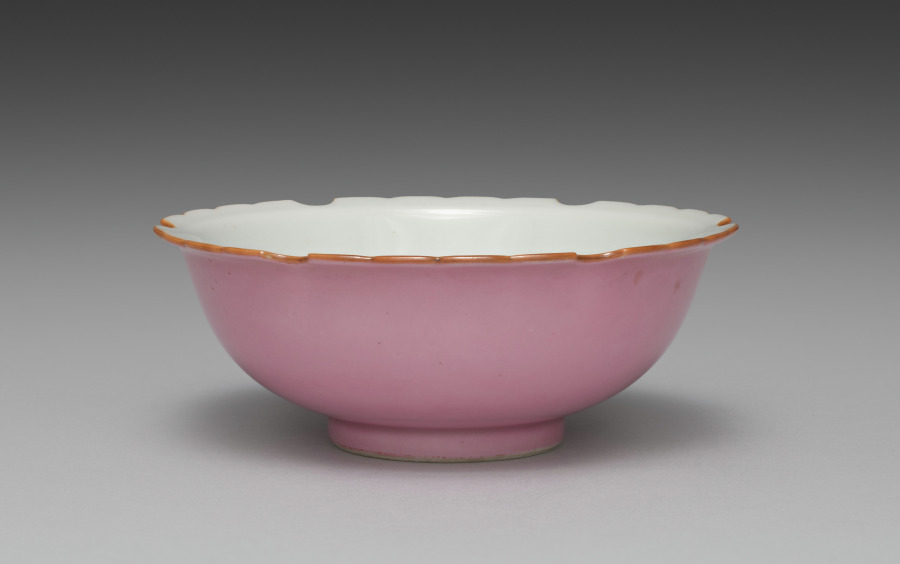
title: Dish from Snow-Flake Side Dishes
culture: Japan, Meiji period (1868–1912)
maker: Seifū Yohei III (Japanese, 1851–1914)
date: 1893–1914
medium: One from a set of six porcelain dishes; porcelain with lobed rims and pink glaze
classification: Ceramic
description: According to the box lid, this set of 6 side dishes, or mukōzuke, are “snow-flower style” (sekkashiki), having mouths shaped like snowflakes. Their mouths, which have 6 lobes and scalloped edges, are traced with brown iron oxide at the rim. The outside of each bowl is glazed with a very bright pink over the basin and foot, and the inside is left white. From directly above, one sees a snowflake-like shape, and from the side, they seem to float above a rosy ground.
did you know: The box for this set of dishes has an inscription on the side noting that they were for a person with the family name Nakamoto.